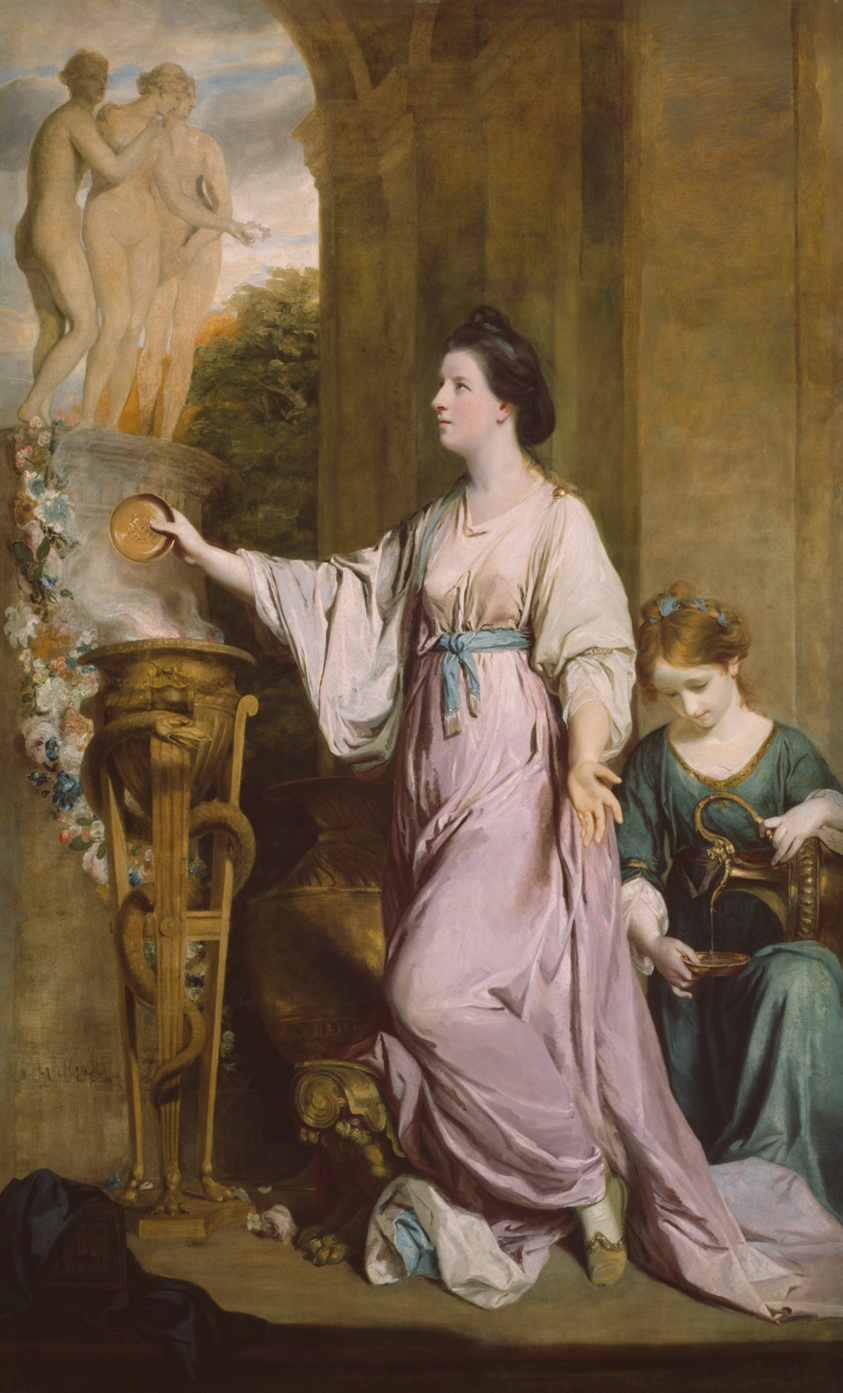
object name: Painting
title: Lady Sarah Bunbury Sacrificing to the Graces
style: 18th Century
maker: Sir Joshua Reynolds (English, 1723–1792)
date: 1763–65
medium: Oil on canvas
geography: England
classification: oil on canvas; portrait; paint; oil paintings (visual works); british; painting; european painting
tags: portraits, woman, Venus, vase, trees, statues, portraits: female subject, portrait, pitcher, nature, mythology, marriages/weddings, love, Greek mythology, Greek gods, foliage, flowers, flora, fire, classical, architecture, architecture, architechture, water, green (color), alters, dresses, mythological figures, pink (color), shrines, women